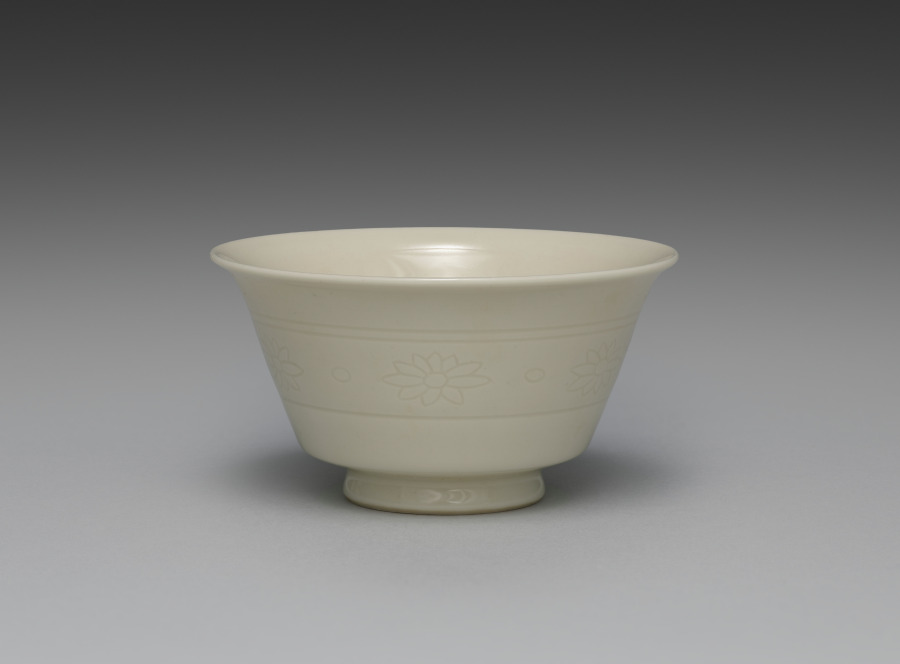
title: Teacup from Teacups with Floral Band Motif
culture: Japan, Meiji period (1868–1912)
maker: Seifū Yohei III (Japanese, 1851–1914)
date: 1893–1914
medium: One from a set of five cups; porcelain with incised decoration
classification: Ceramic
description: The five sencha teacups in this set are decorated with incised flowers and dots between a double band at the top and a single band at the bottom. They are in Yohei III’s creamy taihakuji body and glaze. In their motifs, they are quite similar to an incense burner by Yohei III (see CMA 2022.180), but the flowers are even more simple in design, with no open circle at the center. A label affixed to the side of the box refers to them as “sencha cups in emulation of Korean white [ware].” The reference to Korean ware indicates that even though Yohei was more directly inspired by Qing dynasty wares from the Dehua kilns in Fujian Province in developing his porcelain clay and glaze for works such as these, the general understanding of the continental models still placed them, at least in terms of color, among pieces broadly associated in Japan with Korean white wares. The delicate cups are thinly potted, so they have a highly desirable translucency.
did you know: The delicate cups in this set are thinly potted, so they have a highly desirable translucency.